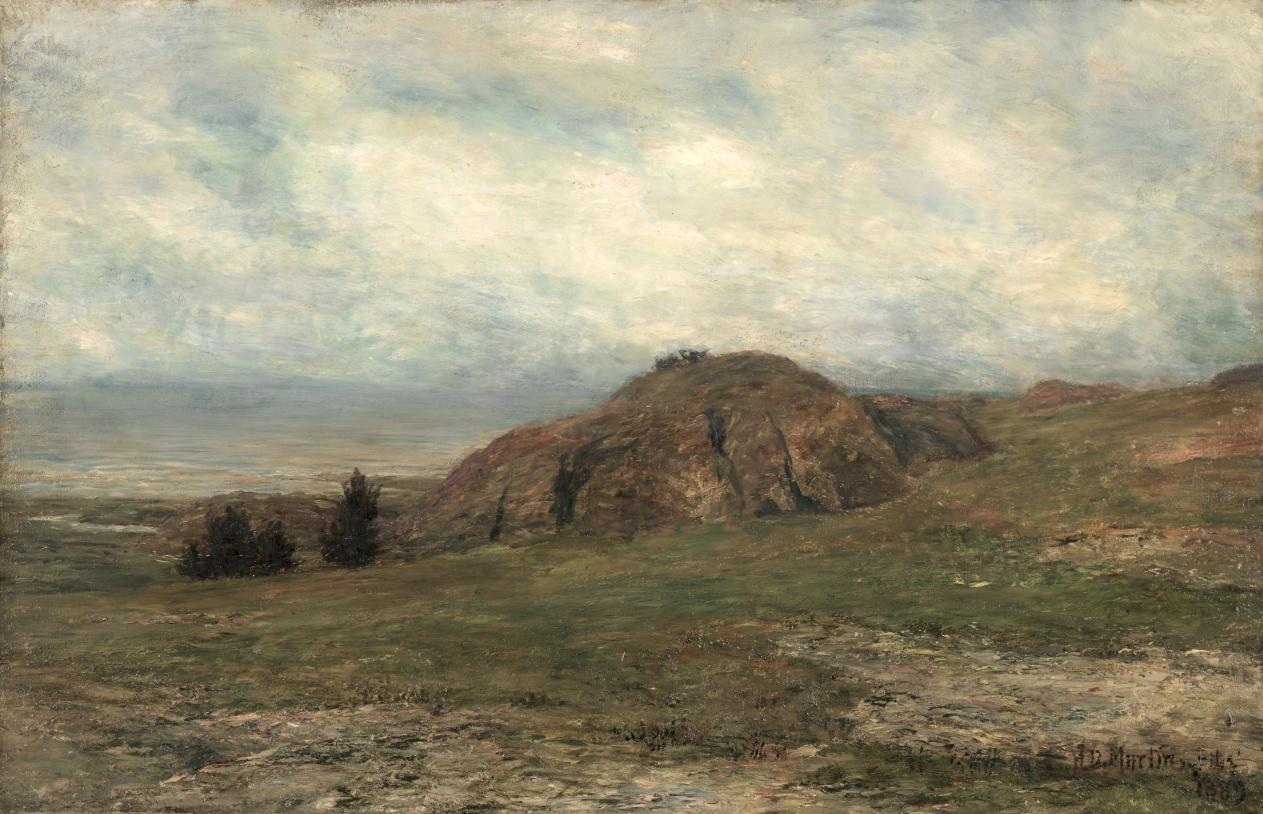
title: Wild Coast, Newport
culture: America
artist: Homer Dodge Martin (American, 1836–1897)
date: 1889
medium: oil on canvas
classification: Painting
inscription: signed lower right: H. D. Martin/1889